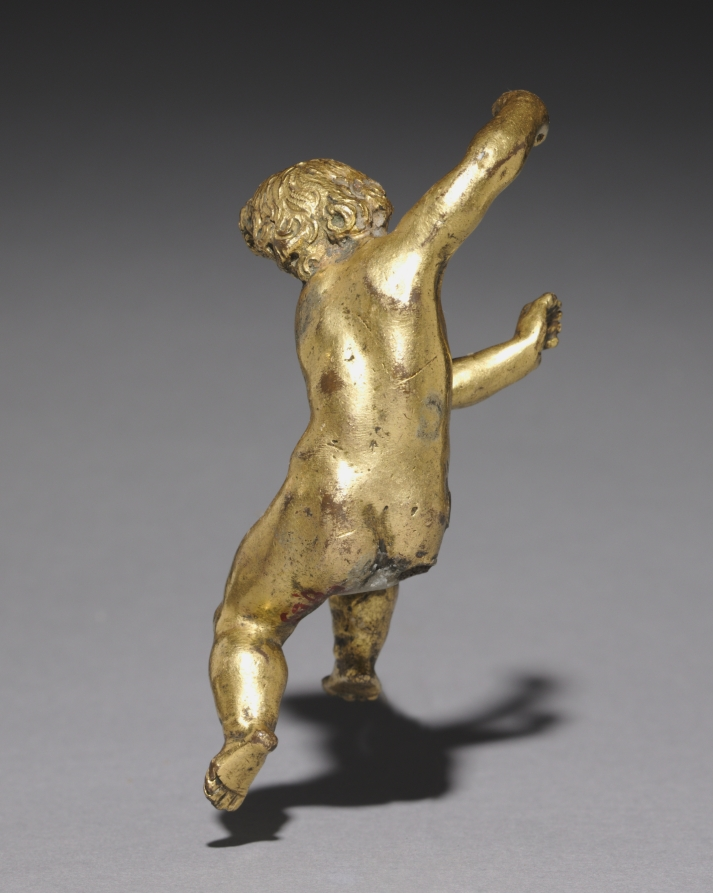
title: Putto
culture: Italy, Rome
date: late 1500s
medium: gilt bronze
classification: Sculpture